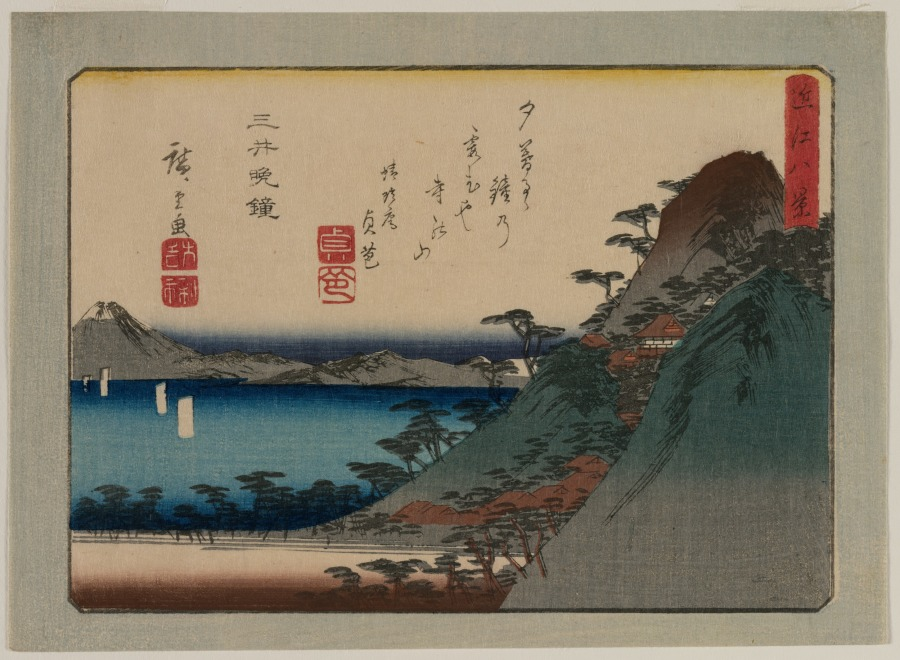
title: Evening Bell at Mii Temple, from the series Eight Views of Omi Province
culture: Japan, Edo period (1615–1868)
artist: Utagawa Hiroshige (Japanese, 1797–1858)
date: late 1830s or early 1840s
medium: color woodblock print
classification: Print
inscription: Signature: Hiroshige ga Artist Seal: Daikichi ri_ (last character unread)